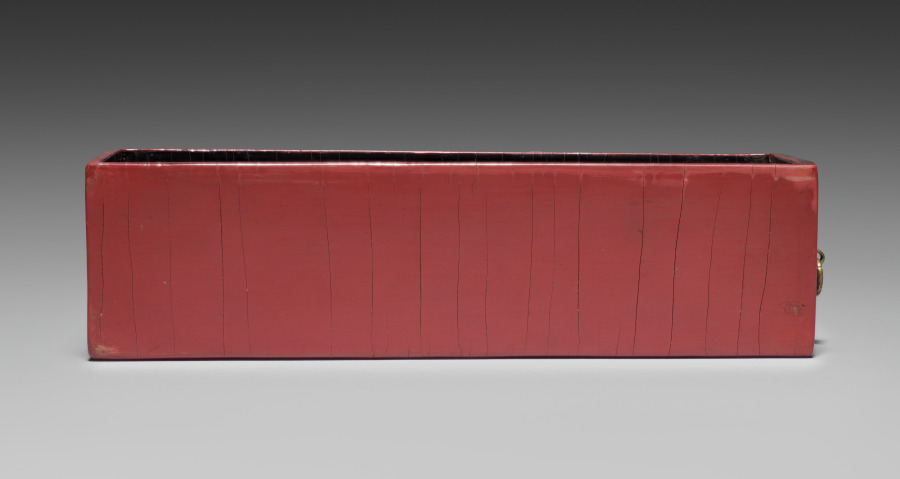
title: Drawer for a Tihong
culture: China, Ming dynasty (1368-1644), Wanli reign (1572-1620)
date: 1585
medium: carved cinnabar lacquer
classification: Lacquer